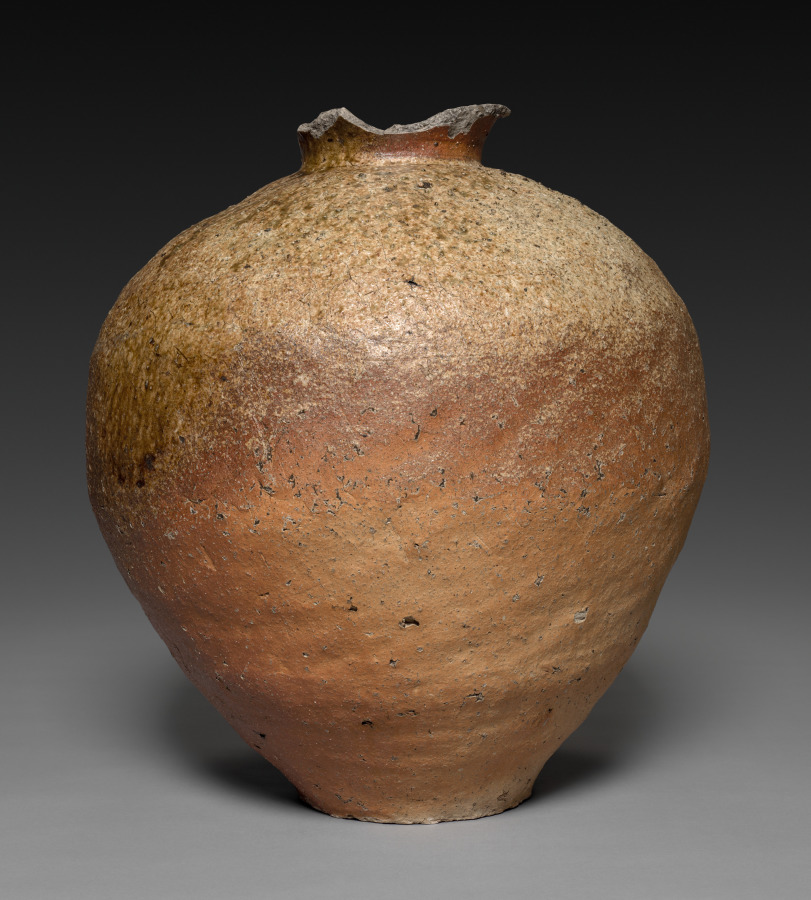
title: Storage Jar (Tsubo)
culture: Japan, Muromachi period (1392–1573)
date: 1400s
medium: stoneware with natural ash glaze (Shigaraki ware)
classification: Ceramic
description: This bulbous clay jar, with its expansive, dry orange-brown surface, white dots of feldspathic stone, and spidery crazing marks epitomizes one type of medieval ware from Shigaraki. This region east of Kyoto and north of the older cultural and religious center of Nara has long been known as a source of superior clay material. Shigaraki storage jars were crafted for strength and durability. The vessel's slightly lopsided shape shows precisely where its three lower clay sections connect with one another. The "stubble" on the upper shoulder sections is highlighted by dripping rivulets of dull-green ash glaze in one small area on the broken neck. The same natural glaze runs over the slope of the shoulder and also appears as a large splash of thin, glossy olive green where the shoulder joins the upper body.